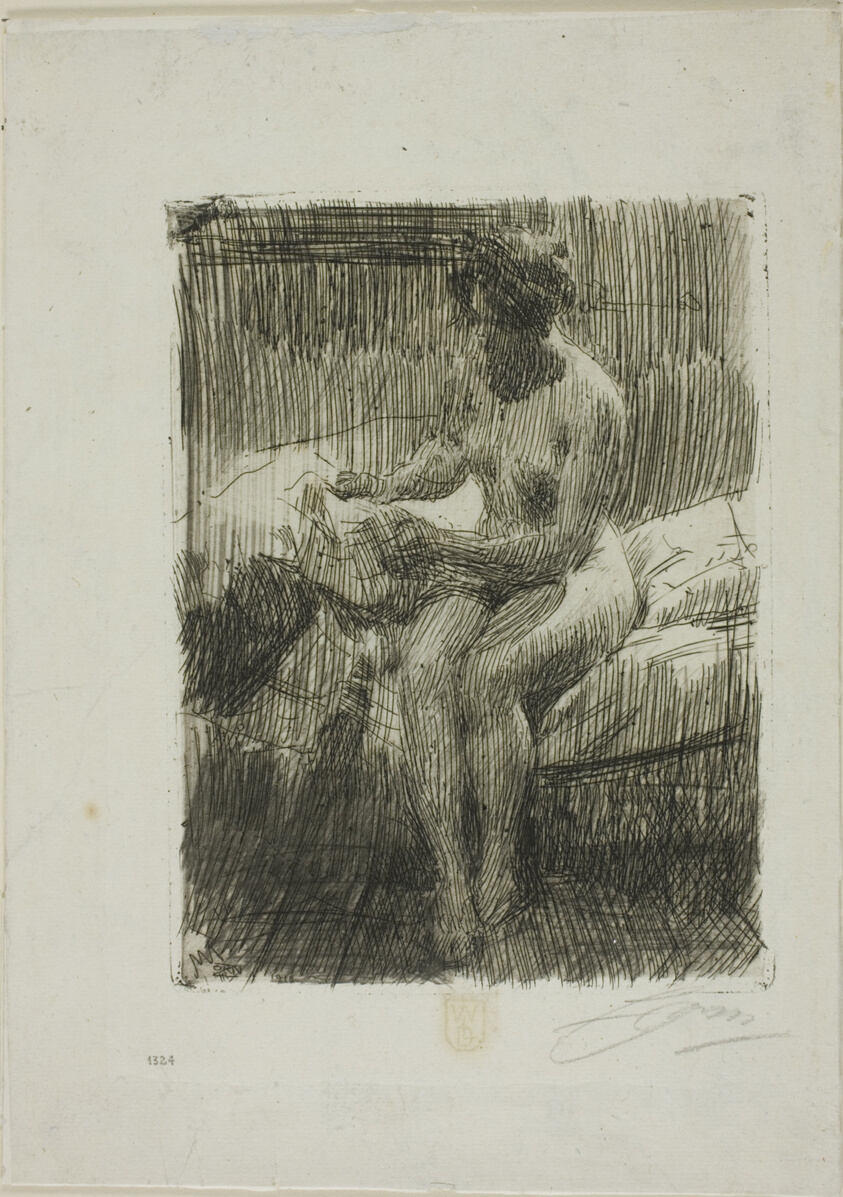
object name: Print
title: Model Reading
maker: Anders Zorn (Swedish, 1860-1920)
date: 1910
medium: Etching on ivory laid paper, laid down on card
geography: Sweden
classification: etching; print; prints and drawing